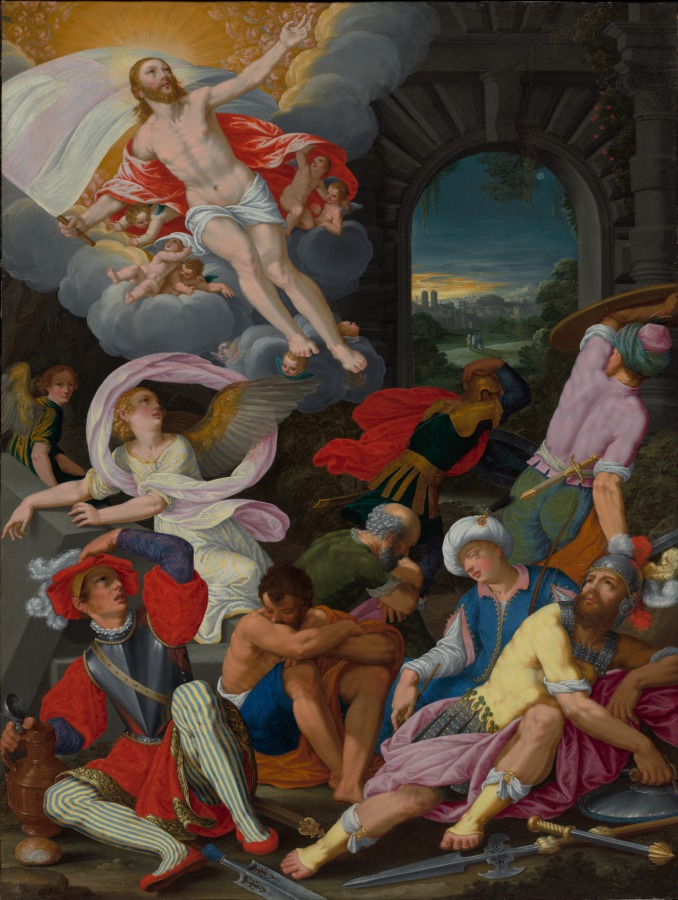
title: The Resurrection of Christ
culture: Germany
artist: Johann König (German, 1586–1642)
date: 1622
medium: oil on copper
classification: Painting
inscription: Signed and dated lower left: Johan. : König / 1622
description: According to Christian belief, three days after his death by crucifixion, Christ rose from the dead and ascended into heaven. König’s interpretation of this traditional theme employs vivid colors and explosive poses to express the drama of the event. Meticulous brushwork delineates exquisite details, and draws attention to the luminous landscape and the three holy women hastening towards Christ’s vacant tomb.